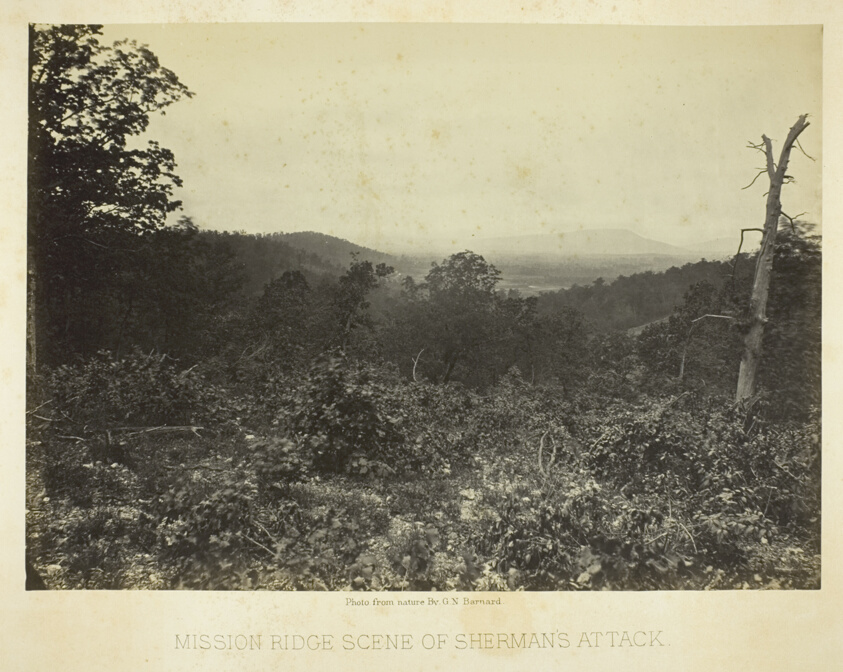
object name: Photograph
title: Mission Ridge Scene of Sherman's Attack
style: 19th century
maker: George N. Barnard (American, 1819–1902)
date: 1864/66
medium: Albumen print, plate 12 from the album "Photographic Views of the Sherman Campaign" (1866)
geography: United States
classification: albumen silver print; photographic process; photography; photograph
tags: Collected by Hugh Edwards, Sherman's Campaign 1866, documentary